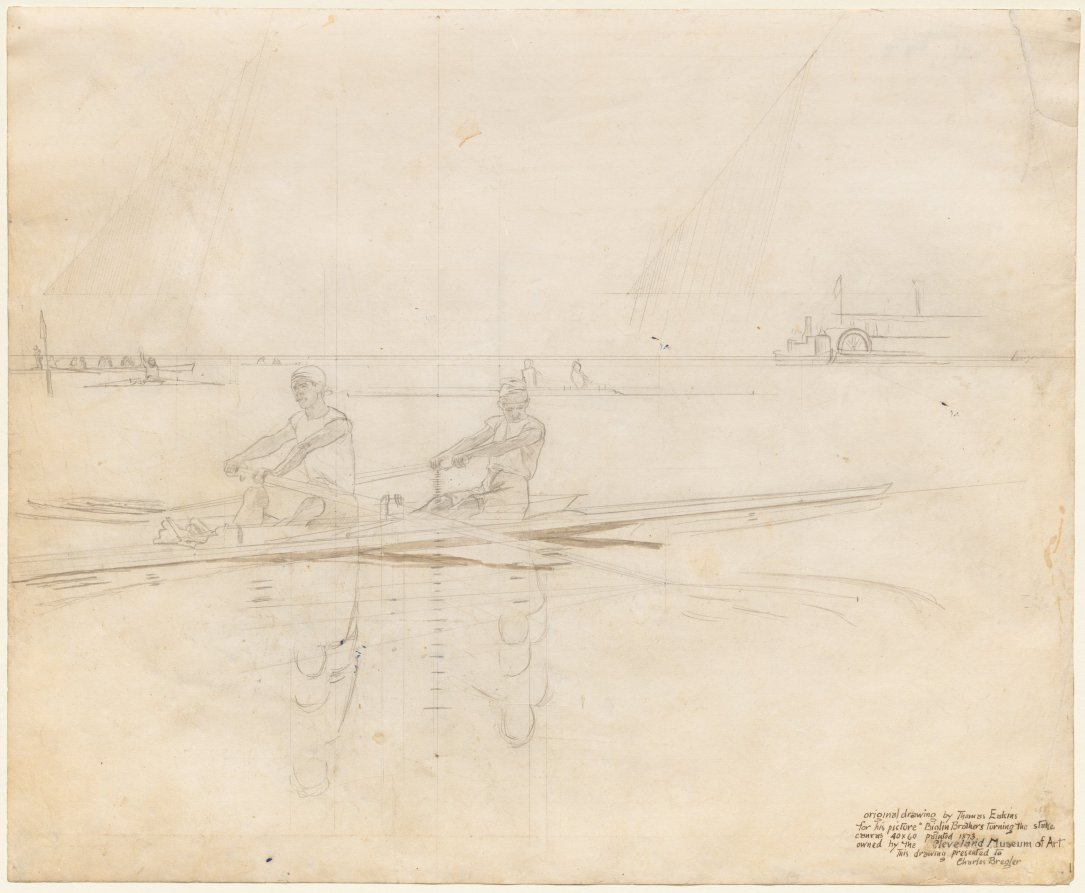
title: The Biglin Brothers Turning the Stake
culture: America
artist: Thomas Eakins (American, 1844–1916)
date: 1873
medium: graphite and brush and brown wash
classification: Drawing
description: Before beginning a large-scale painting such as The Biglin Brothers Turning the Stake, Eakins began a series of specialized studies. He outlined the space of the composition with perspective drawings, such as this sketch in graphite. Eakins also used figure studies when rendering a work, as well as landscape and architectural drawings and his own photographs (examples of which are elsewhere in the exhibition). The practice of using perspective drawings to work out the space of a painting dates back to the Renaissance, revealing Eakins’s academic training.